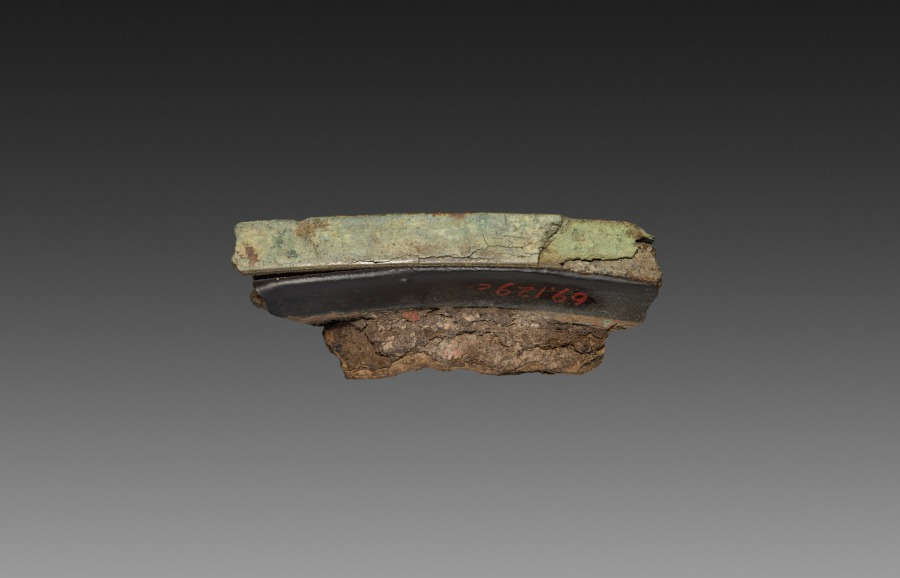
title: Fragment of a Lacquer Tray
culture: China, excavated at Lolang, Xin dynasty (9–23 CE)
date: 9–23 CE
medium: lacquer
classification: Lacquer